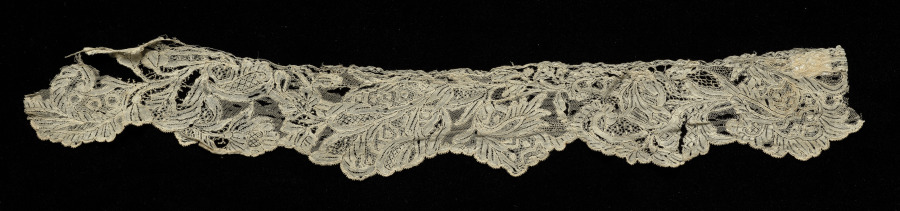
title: Lace Edging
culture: Italy, Burano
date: 1700s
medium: Linen: needle lace (Burano Point)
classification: Lace